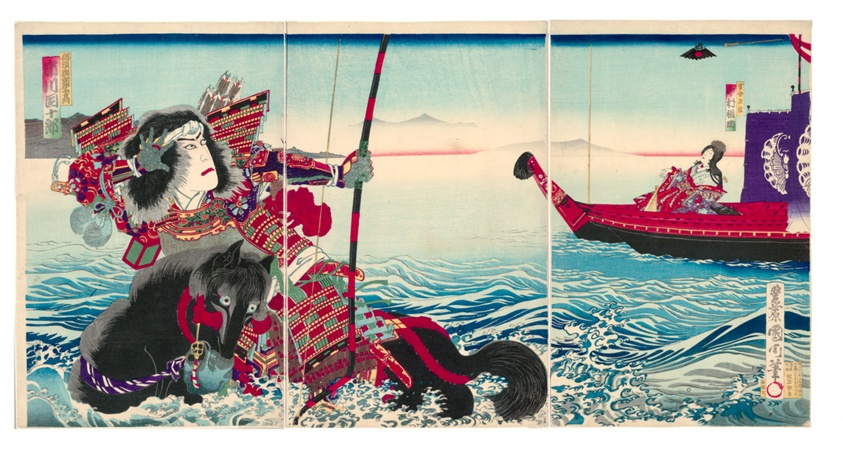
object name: Print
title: Actors Ichikawa Danjuro IX as Nasu no Yoichi Munetaka and Nakamura Fukusuke IV as Tamamushi Gozen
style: Japanese (culture or style)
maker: Toyohara Kunichika (Japanese, 1835-1900)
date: 1885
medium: Color woodblock print; oban triptych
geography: Japan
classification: woodblock print; print; asian art